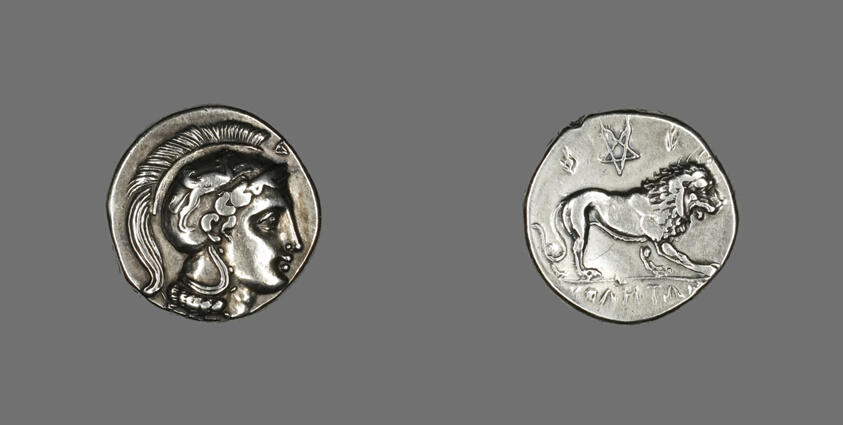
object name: Coin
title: Stater (?) (Coin) Depicting the Goddess Athena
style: greek, ancient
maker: Greek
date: 4th-mid 3rd century BCE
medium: Silver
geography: Elea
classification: coin; ancient art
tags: goddesses, gods (deities)